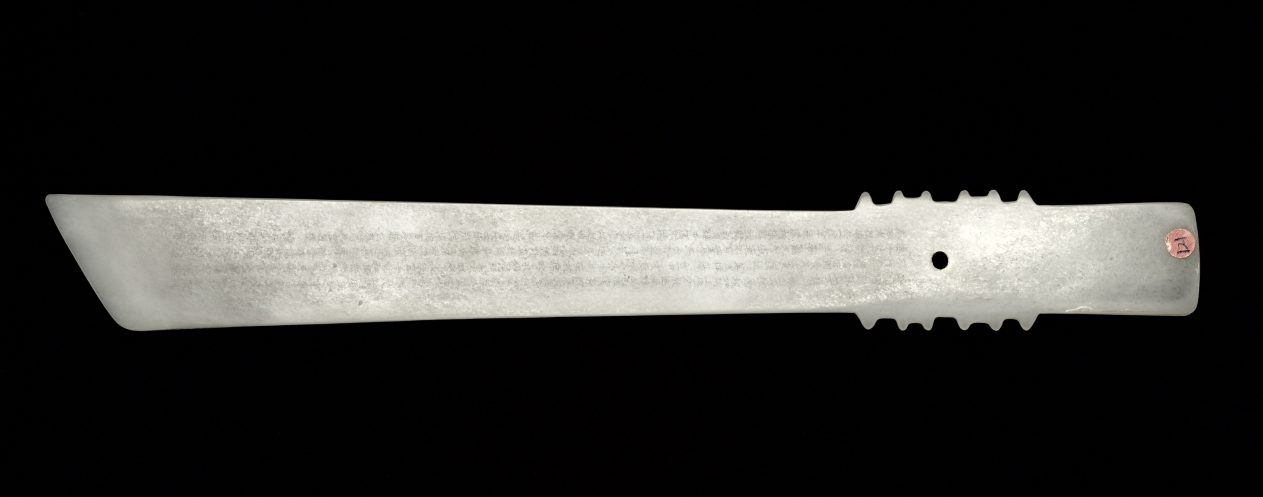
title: Scepter (Gui) with Miscellaneous Poems by Tao Qian (365–427 CE)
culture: China, Possibly Qing dynasty (1644-1911), Qianlong period (1736-1795)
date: 1122 or later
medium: translucent white jade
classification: Jade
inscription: "Respectfully made by the jade works of the palace work bureau, on an auspicious day in the twelfth month of the winter, in the third year of Xuanhe of the Imperial Song (Dynasty)" (1121). On the front and back of the knife are engraved, in minute characters with double contour lines, eight complete poems entitled "Miscellaneous Thoughts" by Tao Yuanming (365–427 CE), one of the greatest early poets of China. Here are two examples: The bright sun sinks beyond the western ridge,/ The white moon rises behind the eastern range./ Afar, afar a myriad miles it flashes,/ Immeasurably vast its light amidst the sky./ A wind comes and enters the bedroom door,/ So in the night pillow-and mat are cold./ The air seems different- - I awake to the season's change./ I cannot go to sleep and know the night's eternity,/ I wish to speak but there is no friend to talk to./ Raising my cup I challenge my lonely shadow./ The days and months fling us aside and pass;/ We have high purposes but cannot realize them./ Thinking of this I have grief and pain at heart,/ And all night long can find no quietness./ It is hard to dwell long in prosperity;/ Rise and decline cannot be reckoned on./ What were formerly lotus buds in May,/ Now in the autumn are but withered seed-pods./ A heavy frost stiffens the prairie grasses- - / They wilt despondently and do not quickly die.-/ The sun and moon come ever circling back./ Once we depart we do not shine again./ I ponder deeply on times long past and gone/ Though to remember them tears my very entrails.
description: This piece derives its shape from the ancient jade scepter known as gui. On both sides of the jade surfaces are the inscribed texts "Miscellaneous Five-Character Poems by the Jin Poet Tao Qian" engraved in minuscule characters, with a reference indicating that the piece was made by the jade workshop of the Xiuneisi Office in 1122 of the Xuanhe reign. This Northern Song attribution is, nevertheless, questionable.